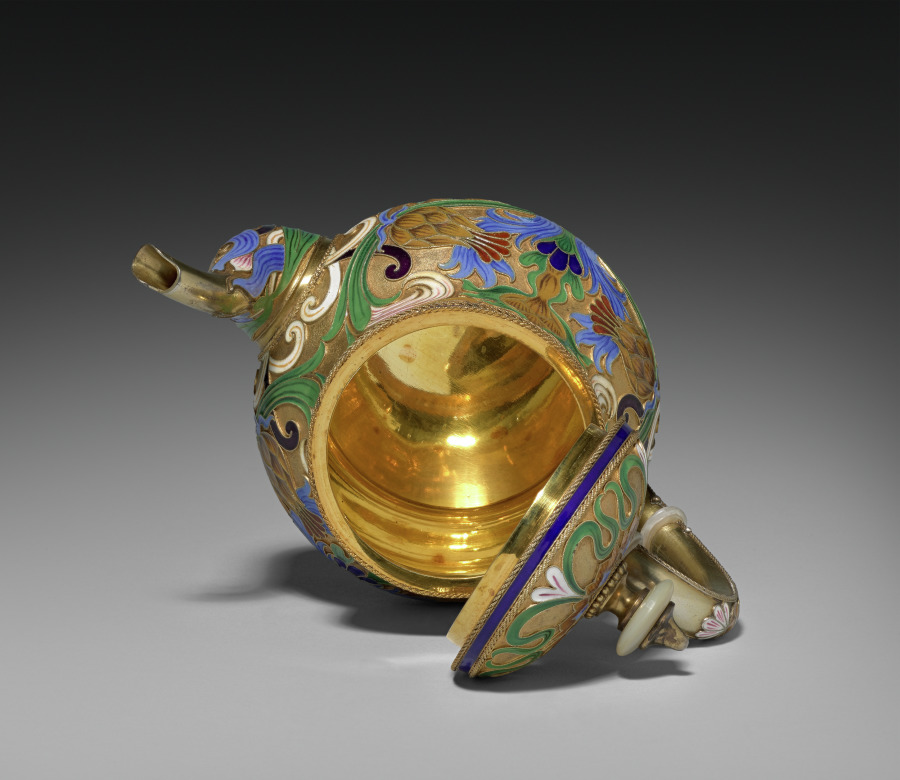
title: Covered Teapot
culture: Russia, St. Petersburg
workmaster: attributed to Feodor Ivanovich Rückert (Russian, 1840–1917)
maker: House of Fabergé (Russian, 1842–1918)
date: 1887–96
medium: silver gilt, opaque cloisonné enamel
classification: Miscellaneous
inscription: 84, St. George [assay mark for Moscow, 1882-1896]; C. Fabergé (in Cyrillic); double-headed eagle [imperial warrant]; St. George; initials of Carl Fabergé (in Cyrillic).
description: Fabergé’s craftsmen in Moscow, especially under the watchful eye of workmaster Feodor Rückert, became known for their work in the pan-Slavic or neo-Russian style, hearkening back to 17th-century motifs of Russian folk art. Often on rather conventional shapes, Rückert and his silversmiths created an explosion of color, achieved through the historic technique of cloisonné enamel in which tiny metal lines are soldered to the surface then filled with glass powders in various colors and fired to create a high gloss finish. The result is a spectacular evocation of the 17th-century originals. Far from mere copies, however, Rückert's designs, such as this tea service, employ naturalistic or abstract motifs in a thoroughly modern adaptation of a remarkable earlier period of Russian art and decoration.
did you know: This covered teapot is part of a larger tea service.